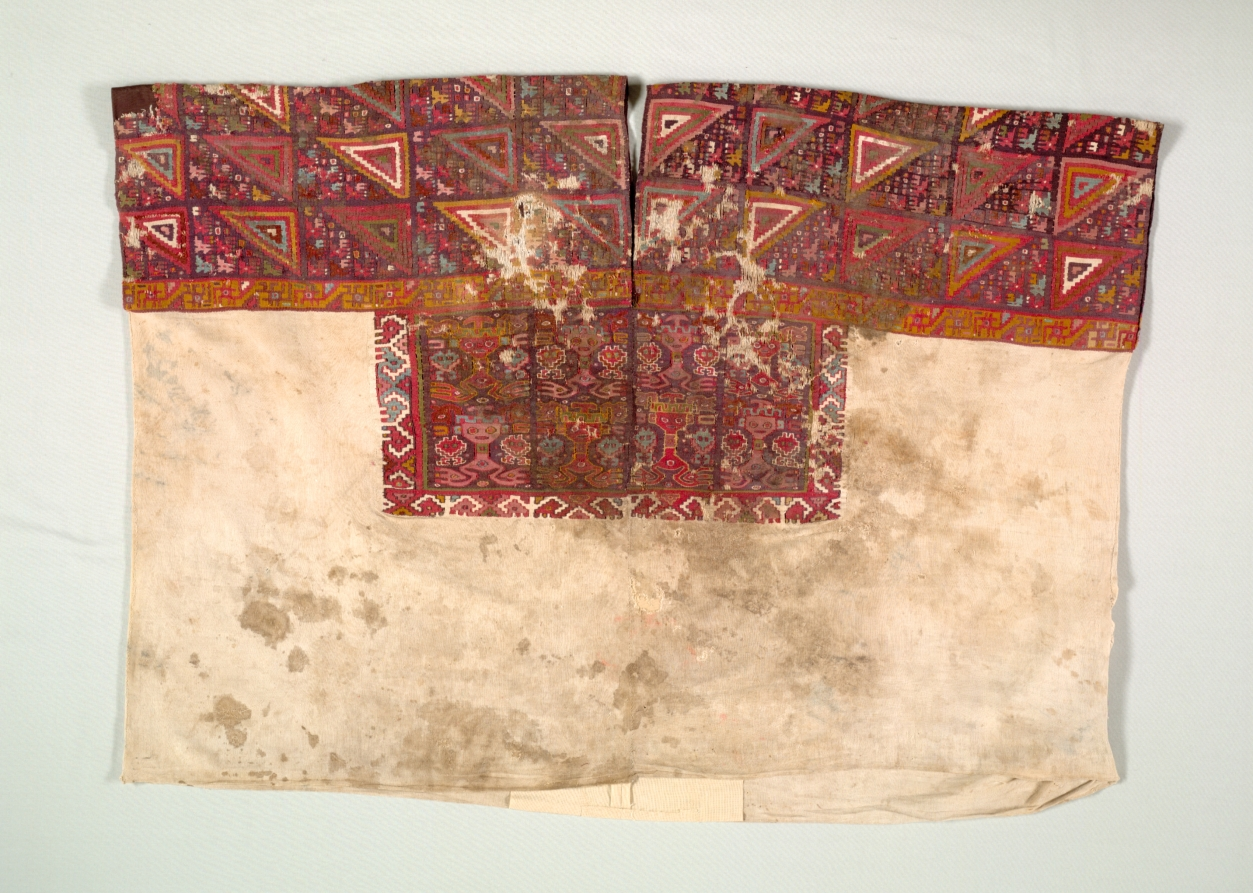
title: Tunic (Shirt) with Tapestry-woven Yoke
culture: Central Andes, Northern Central Coast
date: 650–850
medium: camelid fiber and cotton; tapestry-weave yoke and chest plaque, plain-weave body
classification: Textile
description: Likely an item of men’s wear, this tunic exhibits a variety of motifs. The upper panels feature an especially pronounced triangular pattern. The rectangle at the center of the chest displays a repeated frontal figure that stands out for its relatively large size and more rounded style. The surrounding elements are more right-angled, including the small figures in flanking positions and the birds in the borders.